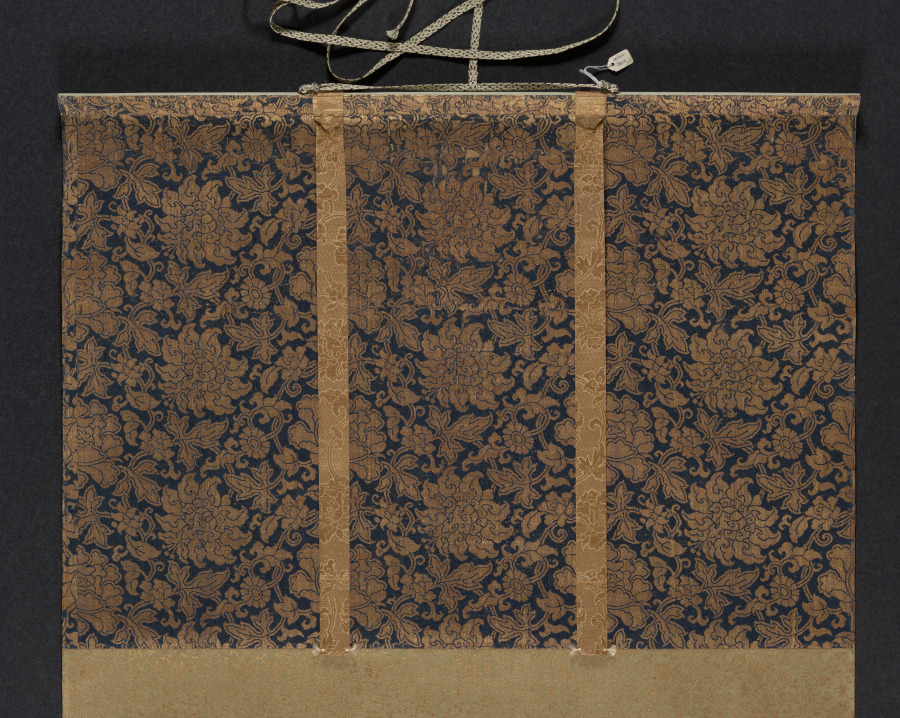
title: Dragon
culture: China, Southern Song dynasty (1127-1279)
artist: Fachang Muqi (Chinese, 1220–1280)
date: c. 1250–79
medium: Hanging scroll; ink on silk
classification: Painting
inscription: 道有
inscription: 雜華室印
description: The dragon and tiger are tied to the philosophical concept of yin and yang, which describes opposite but complementary forces. The dragon occupies a tiered background of waves and mist. Its luminous head emerges from the darker passages, and its narrow twisting body is serpent-like. By contrast, the close-up view of the tiger emphasizes its bulk. The tiger bends its head to lick its paw while its tail curls in the foreground. In their original Chan Buddhist context, this pair of scrolls likely flanked a central image, like the Bodhisattva Guanyin. The silk has darkened over the centuries, and the slight reddish shading in the tiger’s tongue and nose has faded.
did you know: Fachang Muqi was a Chinese Chan Buddhist monk and painter.